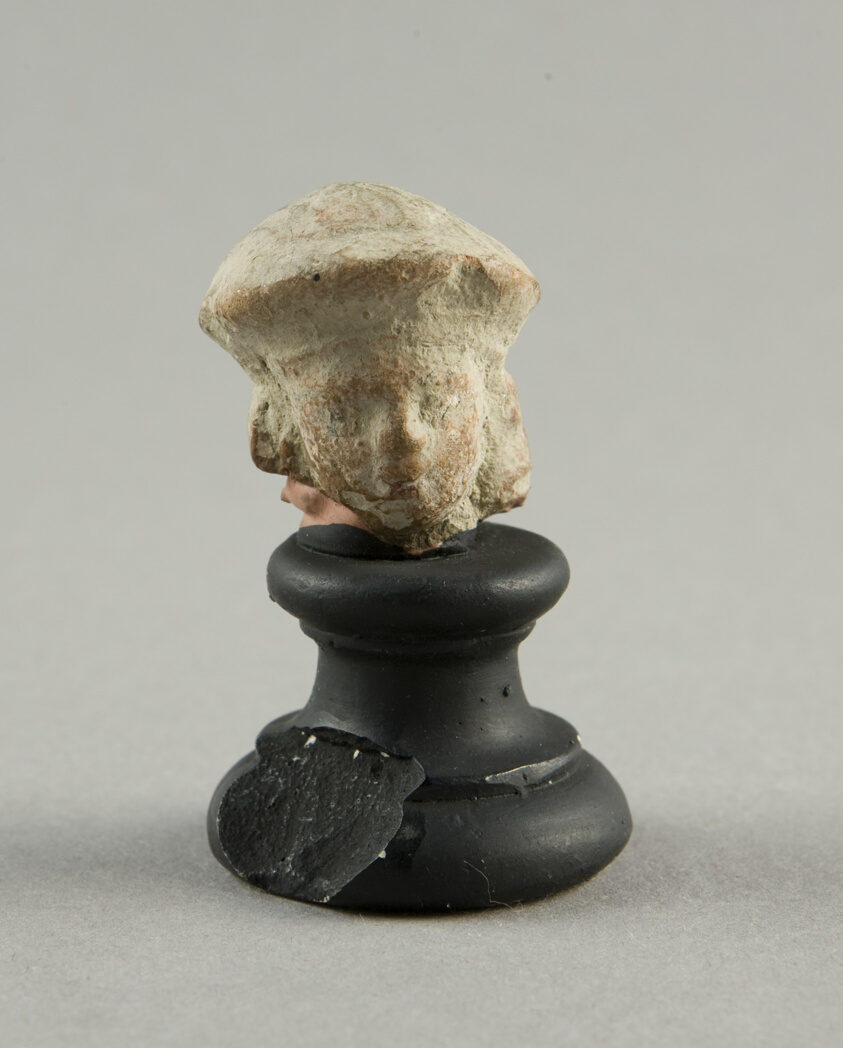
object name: Sculpture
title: Head of a Child or Young Boy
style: greek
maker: Greek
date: 5th-4th century BCE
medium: terracotta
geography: Greece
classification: earthenware; ceramics; sculpture; ancient art